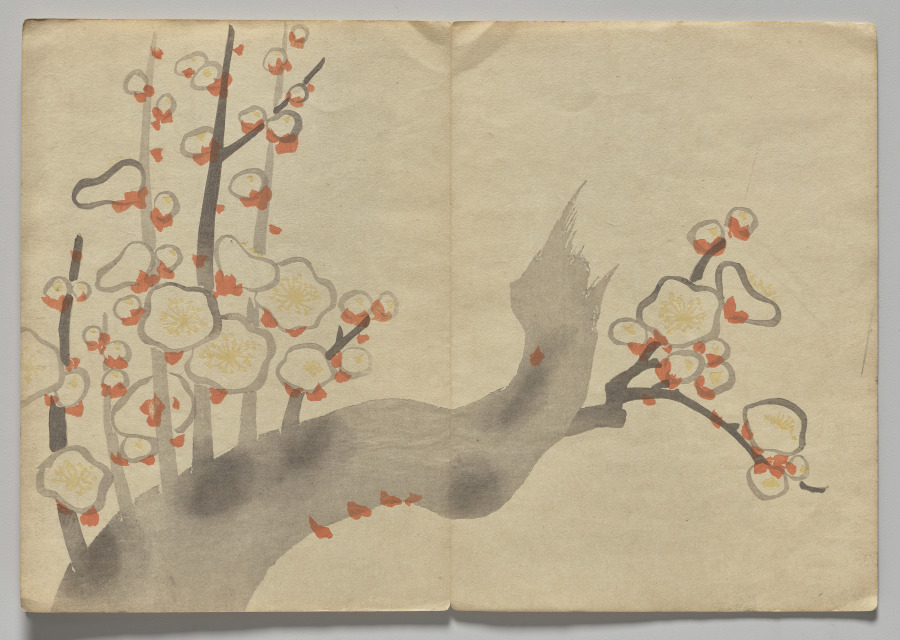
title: Scene from The Kōrin Picture Book (Volume 2)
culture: Japan, Edo period (1615–1868)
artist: Nakamura Hōchū (Japanese, d. 1819)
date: 1800s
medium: color woodblock printed book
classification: Bound Volume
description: Ogata Korin (1658-1716) was one of the most admired artists of Rimpa, or "decorative school painting." These books by the charming later-generation Rimpa artist Hochu record Korin's inventive designs.